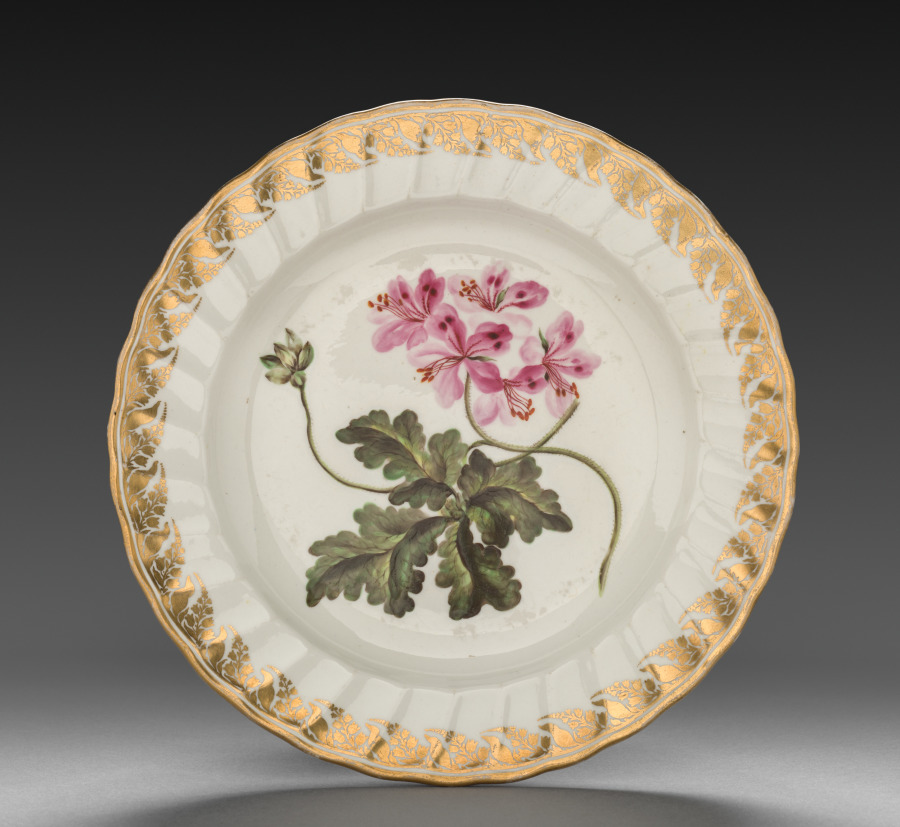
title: Plate from Dessert Service: Geranium Terabinthinum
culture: England, Derby, 18th century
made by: Derby (Crown Derby Period) (British)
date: c. 1800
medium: porcelain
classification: Ceramic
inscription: inscribed in blue on back: Geranium Terebinthinum./crown/crossed batons and dots/D/115. At edge: 9.